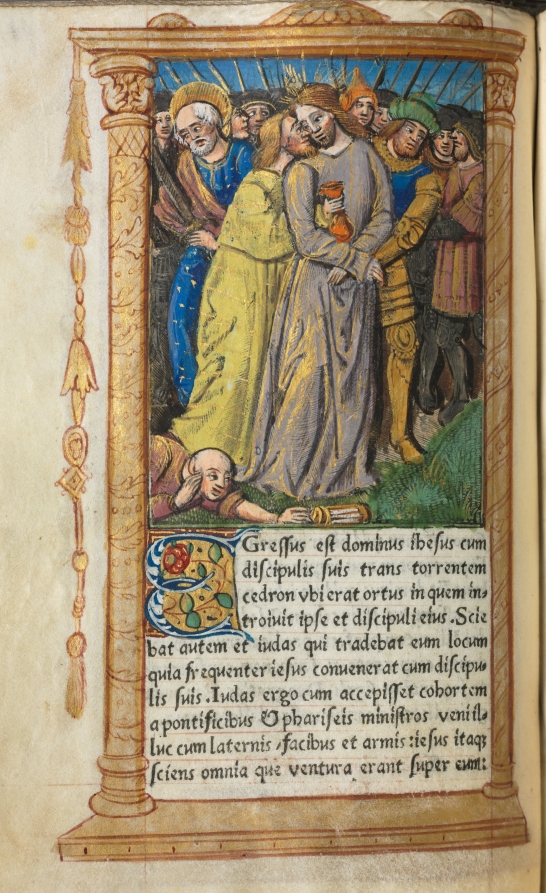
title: Printed Book of Hours (Use of Rome): fol 20v, Christ in Gethsemane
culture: France, Paris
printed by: Guillaume Le Rouge (French, Paris, active 1493–1517)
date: 1510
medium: 112 Printed folios on parchment, bound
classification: Bound Volume